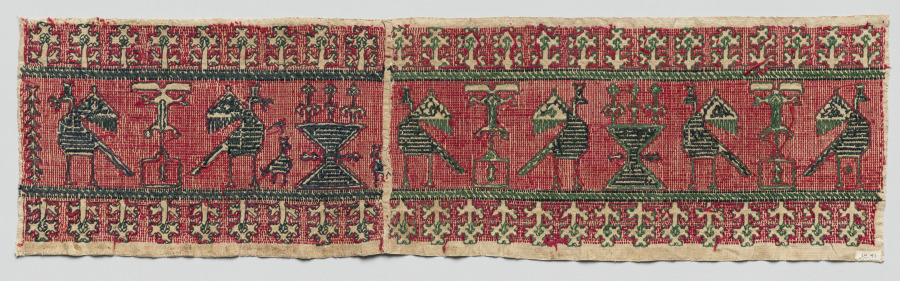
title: Fragment of a furnishing textile (one of five)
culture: Africa, North Africa, Morocco, Azemmour, Moroccan embroiderer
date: 1700s–1800s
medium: Linen, silk, dye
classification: Embroidery